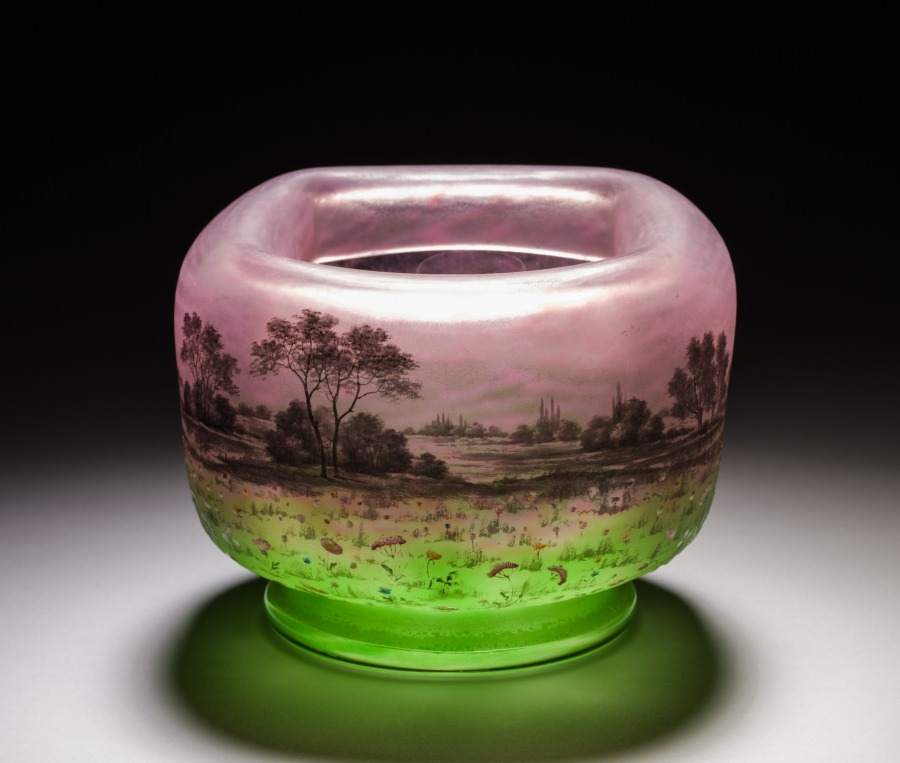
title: Bowl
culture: France, Nancy, late 19th-early 20th Century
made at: Daum Brothers (French)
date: late 1800s - early 1900s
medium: glass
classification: Glass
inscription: signed on bottom: Daum Nancy.